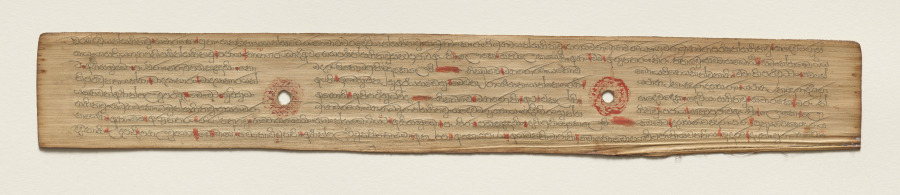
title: Leaf from a Buddhist Manuscript (verso)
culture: Sri Lanka, Singhalese, Late 17th century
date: c. 1700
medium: fiber paper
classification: Manuscript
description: Palm leaf material is still used for manuscripts in Sri Lanka. The palm leaves are prepared first by boiling them, drying them in the sun, and then rubbing them with oils. Scribes then use a metal stylus to incise the text. Then charcoal powder is wiped across the pages, filling in only the inscribed lines.